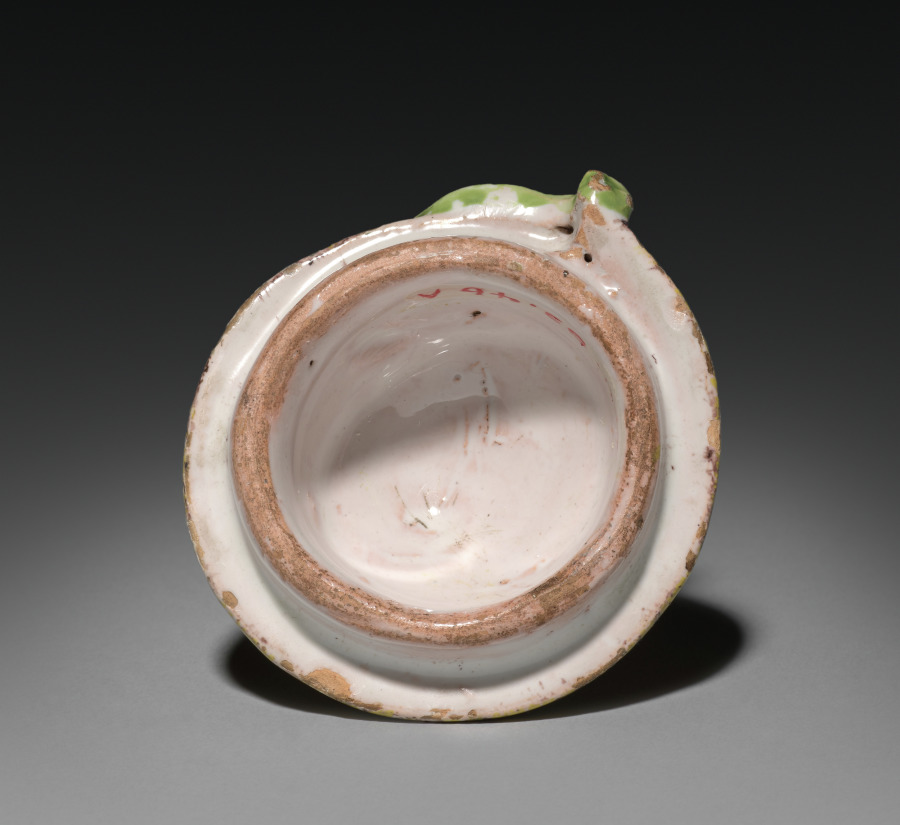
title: Cover for a Box in the Form of a Snail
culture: France, 18th century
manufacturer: Strasbourg Factory (France)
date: c. 1750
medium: faience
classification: Ceramic